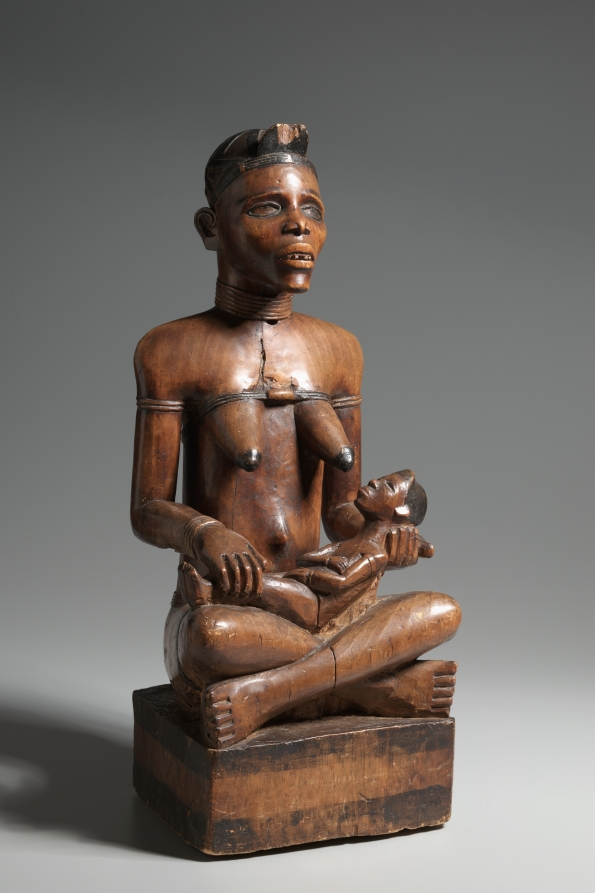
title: Mother and Child Figure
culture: Africa, Central Africa, Democratic Republic of Congo (most likely), Cabinda, or Republic of the Congo, probably Yombe-style maker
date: late 1800s–early 1900s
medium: Wood and paint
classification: Sculpture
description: This Mother and Child Figure is attributed to the Yombe peoples, who inhabit a large territory now divided among the nations of Congo, Democratic Republic of Congo, Zambia, and Angola. Its origin has been traced to the areas surrounding the village of a master carver in the western Democratic Republic of Congo, where similarly carved objects were collected in the early 20th century. Its naturalism suggests that it could have been the portrait of a real person, and thus an excellent testimonial to the immense talent of the artist who carved it. Once referred to as the “Burniaux maternity figure,” after the Belgian collector F. Burniaux, who owned it from about 1930 to 1980, the sculpture was acquired by the Cleveland Museum of Art in 1998.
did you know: The sculpture may have been carved in honor of a woman after her death, or after the death of a male chief. Kongo society is matrilineal, so the chief's right to political power is inherited through the female line.